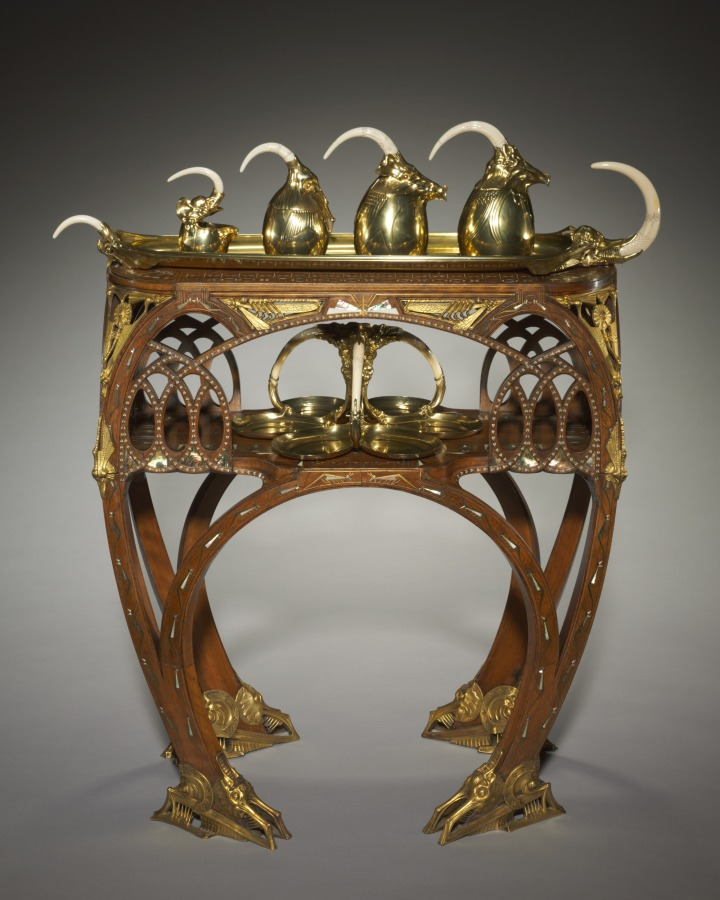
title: Tea Table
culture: France, Paris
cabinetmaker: Carlo Bugatti (Italian, 1856–1940)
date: c. 1907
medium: inlaid wood (mahogany?), cast and gilded bronze mounts, inlays of ivory or bone, metal, and mother-of-pearl (marine mussels or pearl oysters)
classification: Furniture and woodwork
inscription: signed in ligature in white metal inlay on central shelf: Bugatti.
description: Luxurious materials might catch the eye first, but a closer look reveals the imaginary creatures that adorn the surface of this table. Featuring elaborate arches, a favorite motif that appeared throughout Bugatti's furniture, this fantastical imagery is a window into the designer's expressive imagination.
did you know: Carlo Bugatti's sons achieved illustrious careers of their own. Rembrandt Bugatti (1884-1916) became a celebrated sculptor, and Ettore Bugatti (1881-1947) manufactured luxurious automobiles and racing cars.